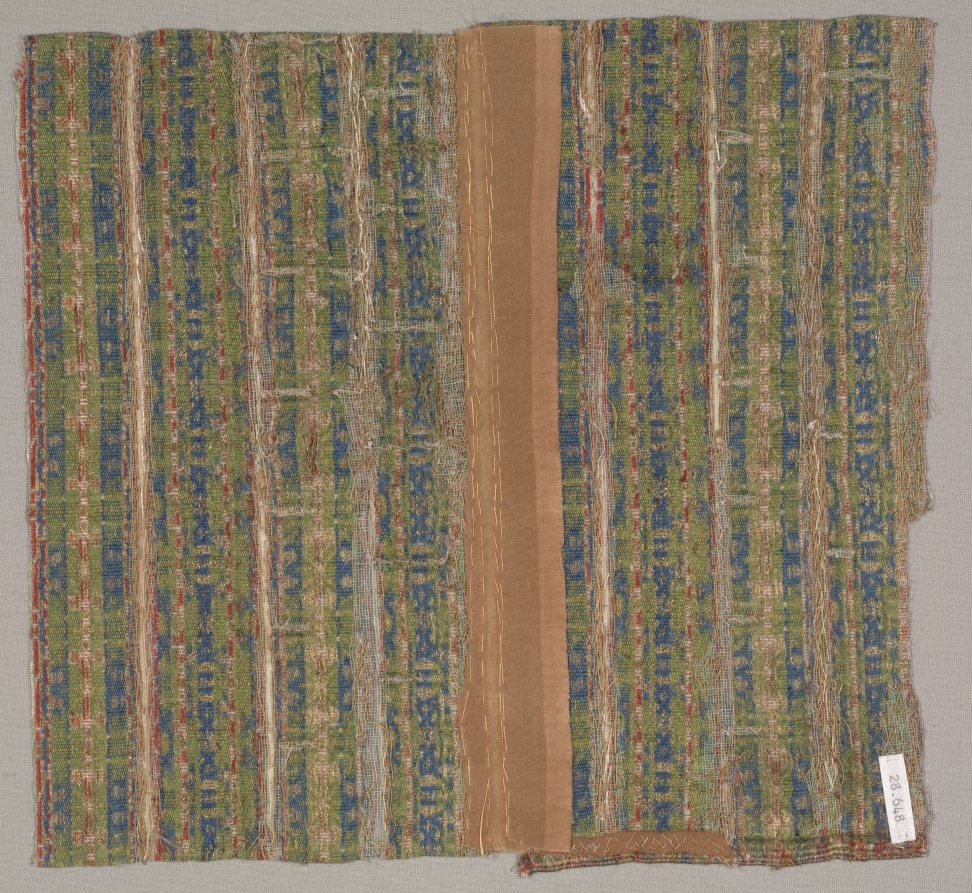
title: Vestment fragment with stars in staggered squares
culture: Spain, probably Almeria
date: 1200s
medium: Silk and gold thread: lampas weave with areas of double cloth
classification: Textile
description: Alternating rows of two different forms of interlacing stars set within square frames convey a jewel-like brilliance with gold and contrasting colors. This fragment was reused in an ecclesiastical vestment that made its way to the cathedral at Lleida in Catalonia, in northeastern Spain. A document dated 1275 records that the Bishop of Lleida and his companions brought “[A] complete set of vestments, of Muslim manufacture, which ornaments they dedicated to San Valero.”